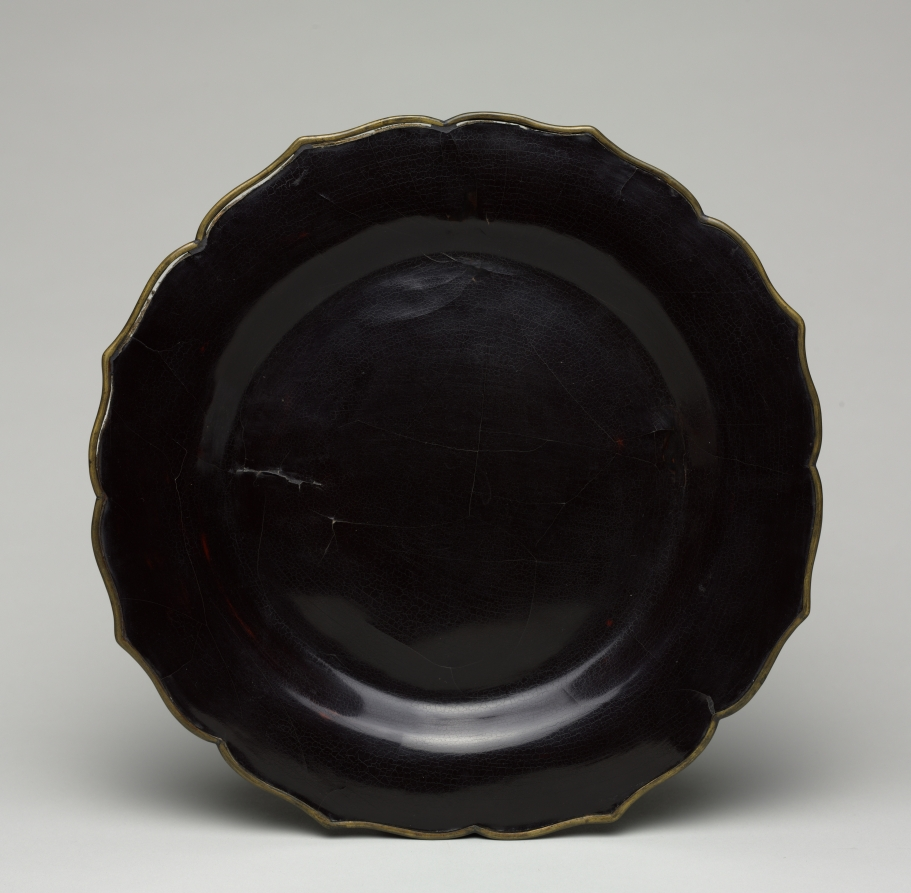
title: Foliate Dish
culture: China, Southern Song Dynasty (1127-1279) - Yuan Dynasty (1271-1368)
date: 1200s–1300s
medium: lacquer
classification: Lacquer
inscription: Red lacquer seal on base of plate.